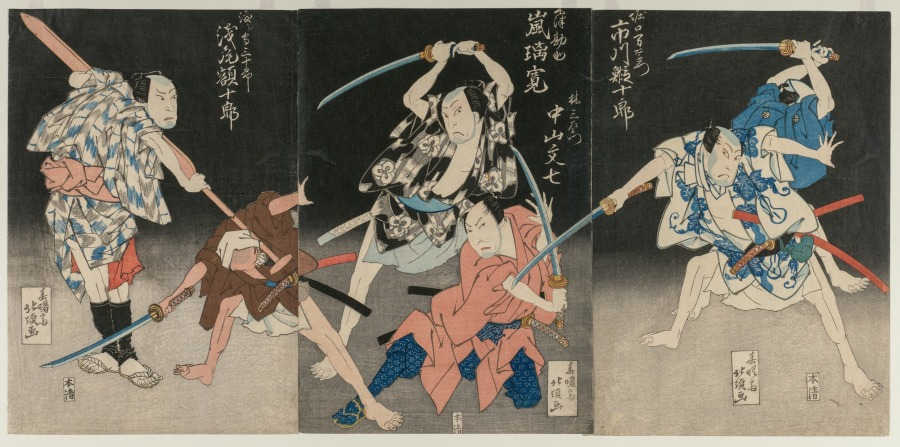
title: Ichikawa Ebijūrō II as Horiguchi Manzaemon (right), Arashi Rikan II as Kizu Kansuke, Nakayama Bunshichi III as Hayashi Sanzemon (center), and Asao Gakujurō as the Ferryman Sanjūrō (left) from the Kabuki Play "Eight Views of the Kizu River by Boating Song"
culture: Japan, Edo period (1615–1868)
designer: Shunshosai Hokuchō (Japanese, active 1822–1830)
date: 1829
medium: triptych of color woodblock prints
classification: Print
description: Three prints form a continuous scene from a Kabuki play written in 1778 by Namiki Gohei I (1747–1808) and produced at the Kado Theater in Osaka in the summer of 1829. It was the final performance for actor Ichikawa Ebijūrō II (1806–1829; right)—highly regarded for portraying villains—because he got sick and died several months later. This design belongs to a category of Japanese prints called “actor images” (yakusha-e or 役者絵). They were collected by fans of popular Kabuki actors. Kabuki is a kind of entertainment that got its start in the early Edo period, evolving from dance performances with simple storylines to long plays with complex plots, elaborate sets, and full musical accompaniments. Performers wear showy costumes and heavy makeup and strike poses called mie at critical moments in the narrative. Dialogue is spoken in a stylized way that resembles singing.